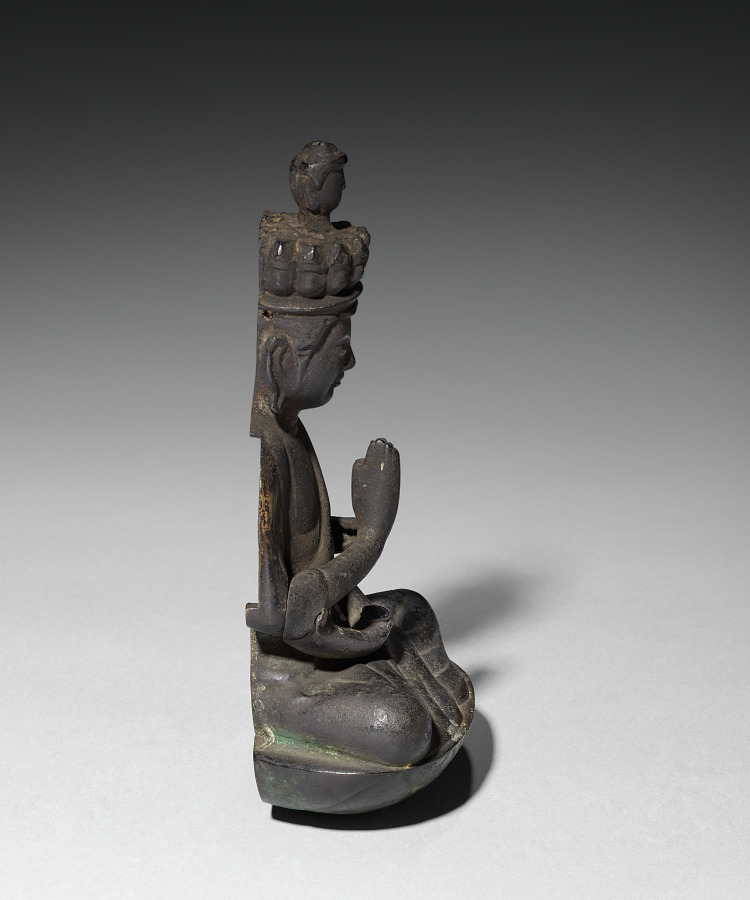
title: Eleven-Headed Kannon (Jūichimen Kannon)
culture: Japan, Heian period (794–1185) to Kamakura period (1185–1333)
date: 1100s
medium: bronze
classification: Sculpture